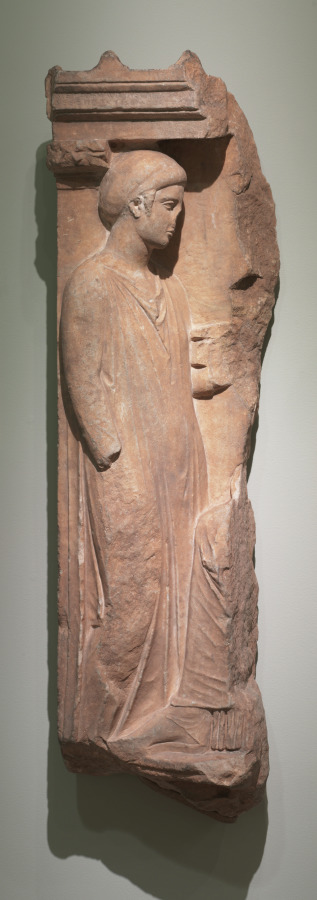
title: Grave Stela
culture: Greece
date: 400–350 BCE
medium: pentelic marble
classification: Sculpture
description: Carved in high relief, the original composition of this Attic grave marker can be reconstructed by comparison with the famous stele of Hegeso in Athens. A maid, who holds a pyxis (small container for personal items) in her left hand approaches a seated matron dressed in a himation (cloak). Much of the lintel above is missing. It would have included an inscription with the deceased's name. The mood is somber and contemplative without any overt expression of mourning.